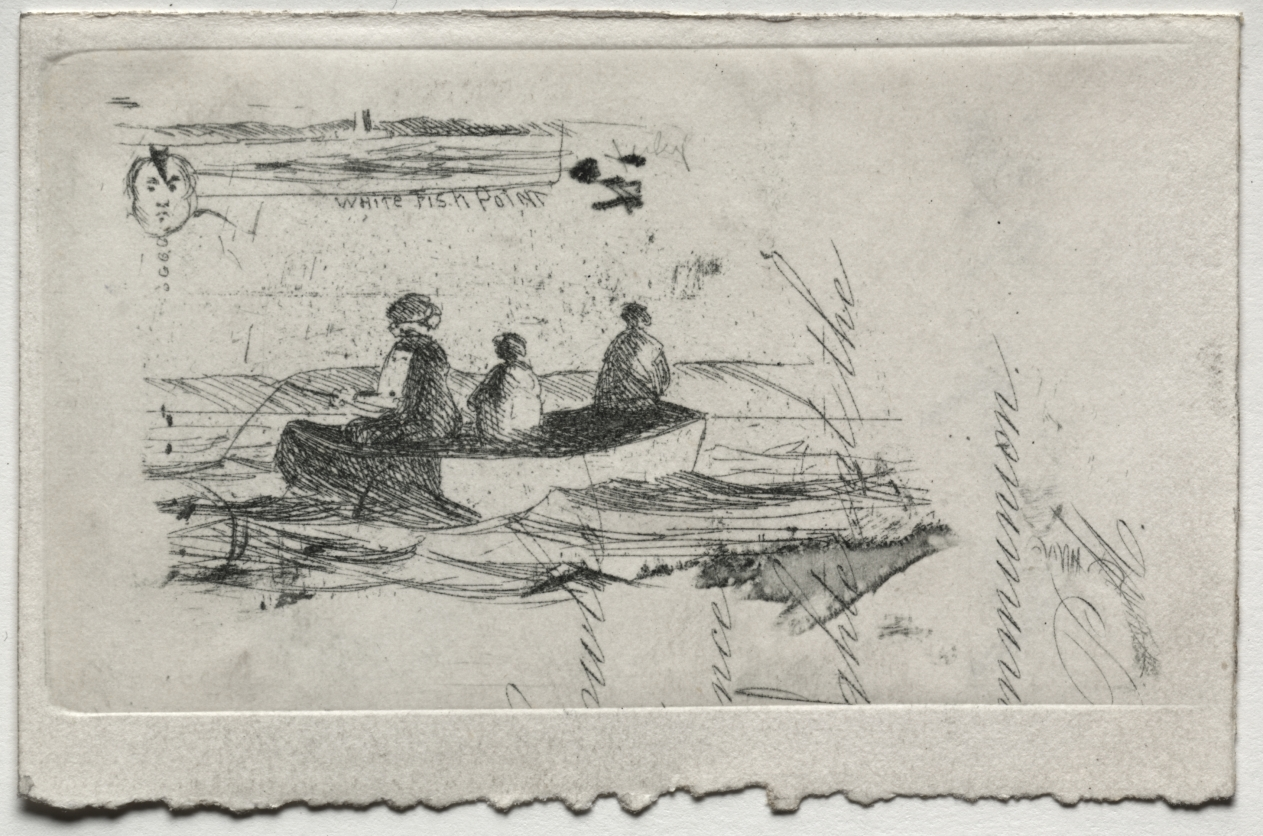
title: Fishing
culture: America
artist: Sion Longley Wenban (American, 1848–1897)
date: c. 1880s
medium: etching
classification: Print